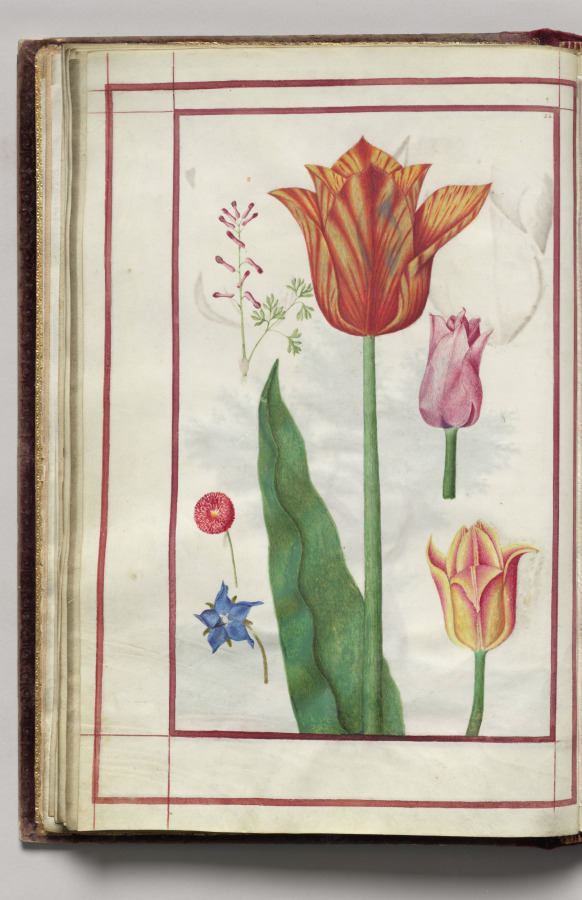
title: Tulip, Pink Dicentra, English Daisy (Bellif), and Borage, folio 13 (verso), from Florilegium (A Book of Flower Studies)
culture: France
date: 1608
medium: watercolor, ink, silver, and gold over occasional traces of pencil, on vellum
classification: Bound Volume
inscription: Dated: Poitiers 1608 (on frontispiece) Signed: On frontispiece in black ink, lower right: Van Kuyk Notation on drawing: Frontispiece: in pencil, lower margin: * élève de Van Kessel, peintre flammand (* in pencil also appears in front of Van Kuyk's name).